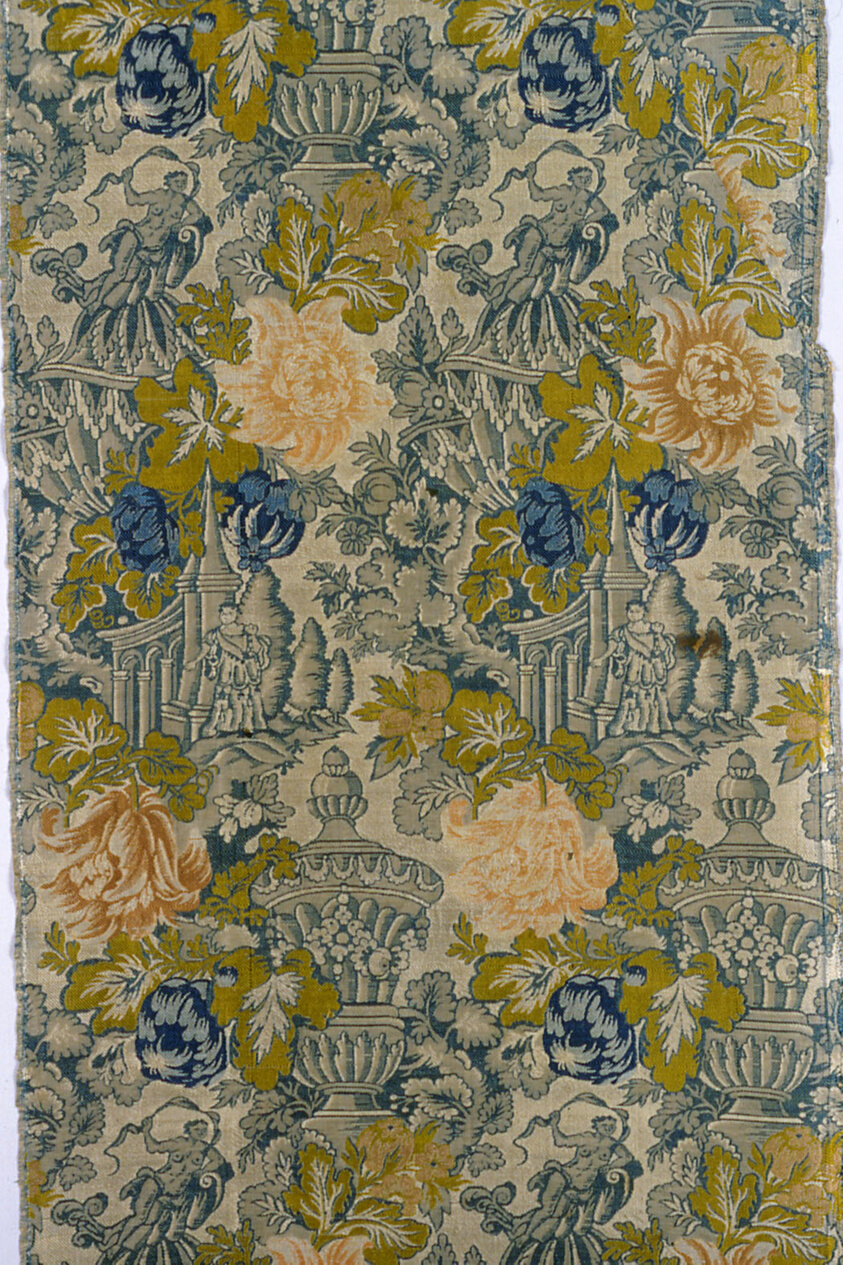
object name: Textile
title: Panel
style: Baroque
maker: France or Italy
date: 1701/50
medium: Silk, plain weave with supplementary brocading wefts and self-patterning two-color complementary ground wefts tied by main warp in weft-float faced twill interlacings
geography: France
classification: textile; weaving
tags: Floating Gardens